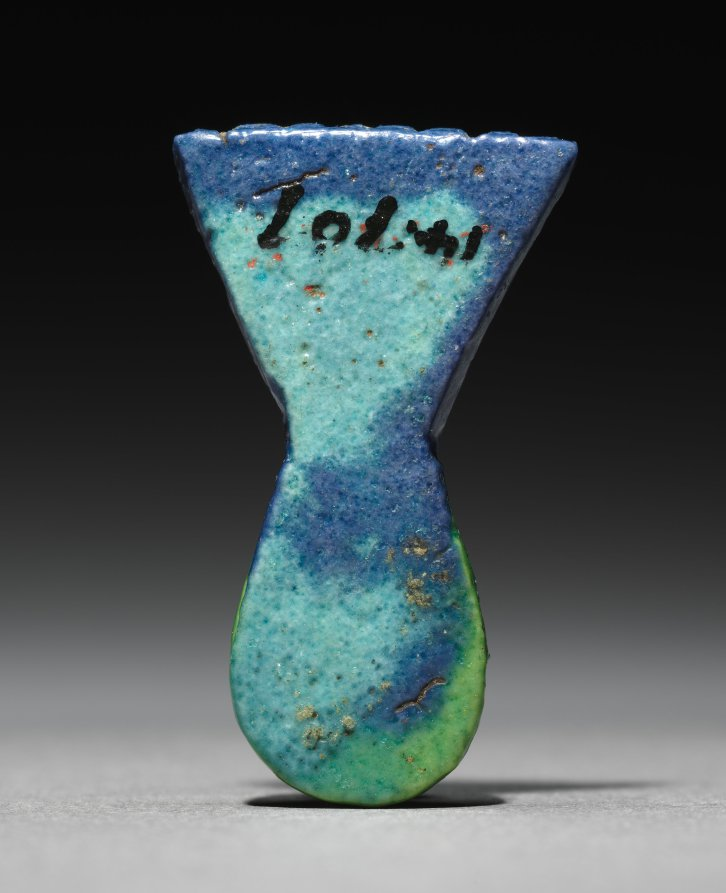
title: Cornflower Inlay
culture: Egypt, New Kingdom (1540–1069 BCE), Dynasty 18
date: 1350–1296 BCE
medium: polychrome faience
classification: Amulets